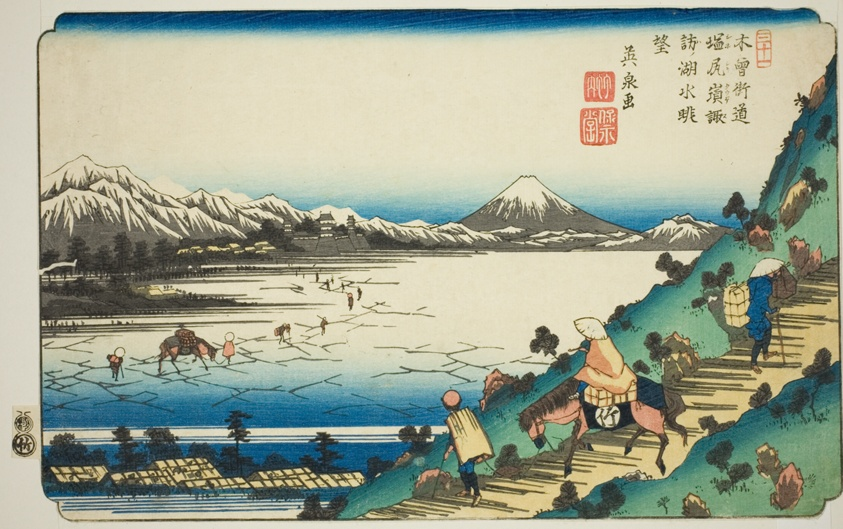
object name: Print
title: No. 31: View of Lake Suwa from Shiojiri Pass (Sanjuichi: Shiojiri toge Suwa no kosui chobo), from the series "[Sixty-nine Stations of the] Kisokaido"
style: Japanese (culture or style)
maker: Keisai Eisen (Japanese, 1790-1848)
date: c. 1835/36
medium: Color woodblock print; oban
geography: Japan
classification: woodblock print; print; asian art